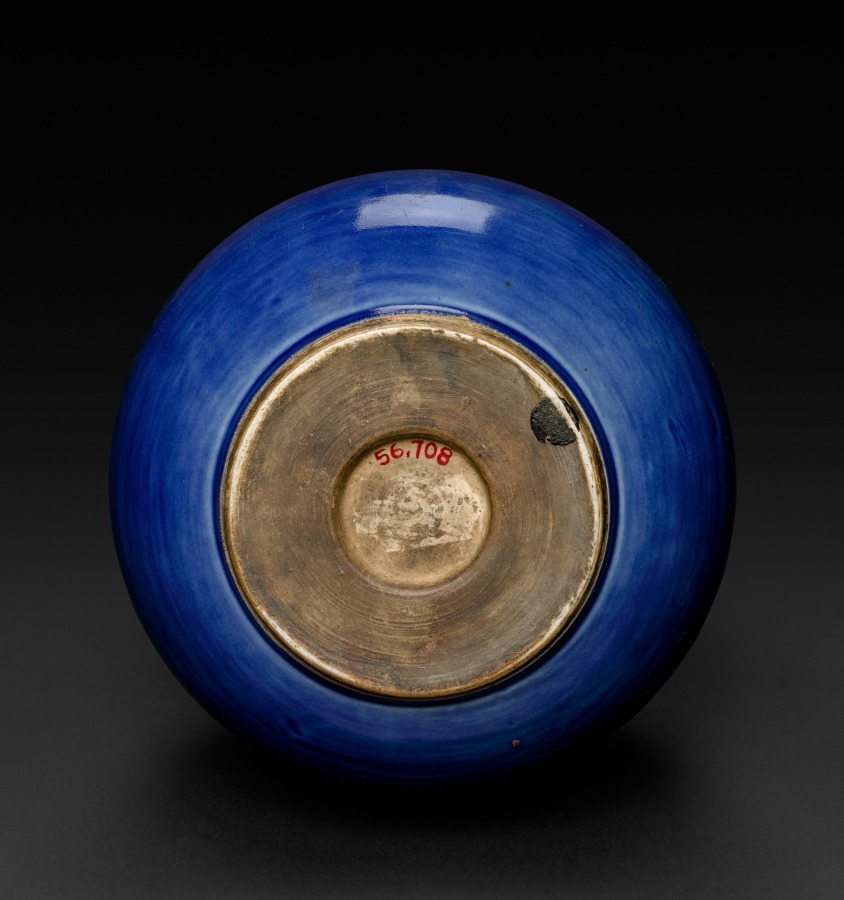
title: Bottle Vase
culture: China, Qing dynasty (1644-1911), Kangxi reign (1662-1722)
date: 1662–1722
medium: porcelain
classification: Ceramic